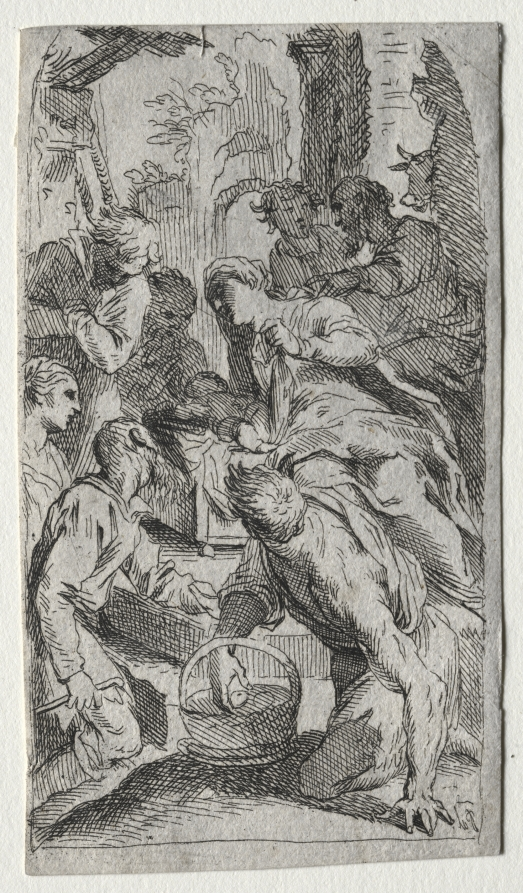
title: The Nativity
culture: Italy, 16th century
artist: after Jacopo Palma il Giovane (Italian, c. 1548–1628)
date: late 1500s–early 1600s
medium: etching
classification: Print